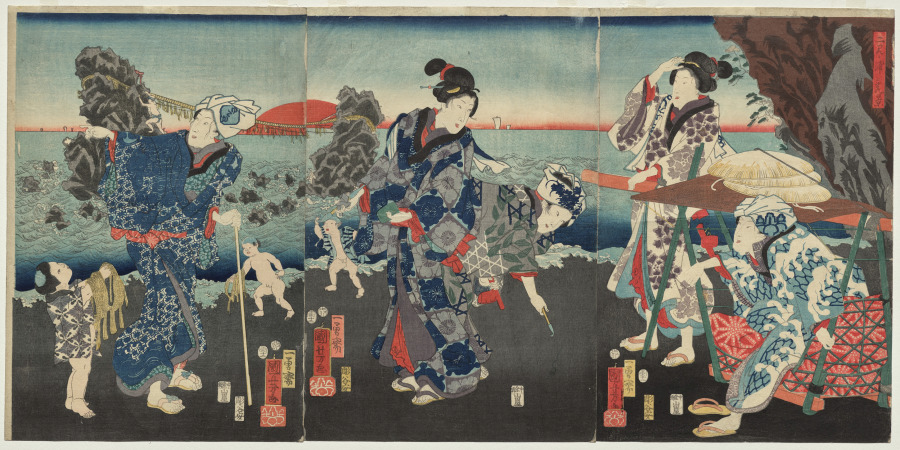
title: Splendid View at Futamigaura Bay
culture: Japan, Edo period (1615–1868)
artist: Utagawa Kuniyoshi (Japanese, 1797–1861)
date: 1854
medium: Triptych of color woodblock prints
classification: Print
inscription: Artist's signature: Ichiyūsai Kuniyoshi ga. Artist's seal: Paulownia.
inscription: Publisher: Yamadaya Shōhei (Nakabashi, emblem). Censorship seal: aratame.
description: These three prints form a continuous scene of figures visiting Futamigaura Bay near Ise Grand Shrine, one of Japan’s most sacred places. In the background, the sun rises between the “Wedded Rocks” joined by a twisted rope, called a shimenawa, used to designate a sanctified space. The rocks mark the entrance to Futami Okitama Shrine and are said to be embodiments of Izanagi and Izanami, the gods who, according to myth, created Japan. Futamigaura was a place where pilgrims purified themselves before visiting Ise and often lodged afterwards.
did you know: The woman at the left has the word Yutaka, one of the artist's seals, on her scarf.